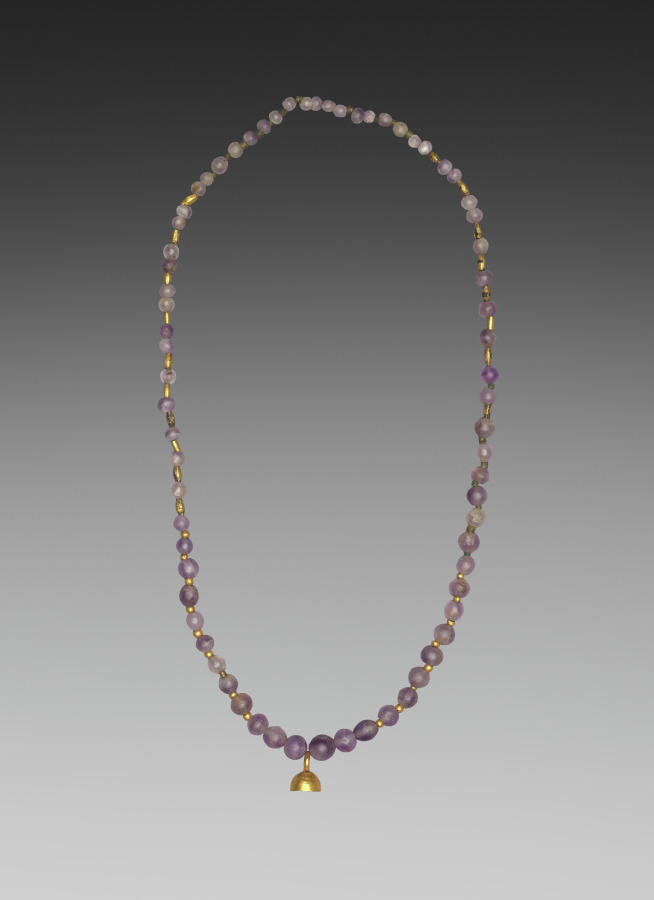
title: String of Beads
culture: Egypt, Middle Kingdom (2040–1648 BCE)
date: 2040–1648 BCE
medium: amethyst and gold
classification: Jewelry